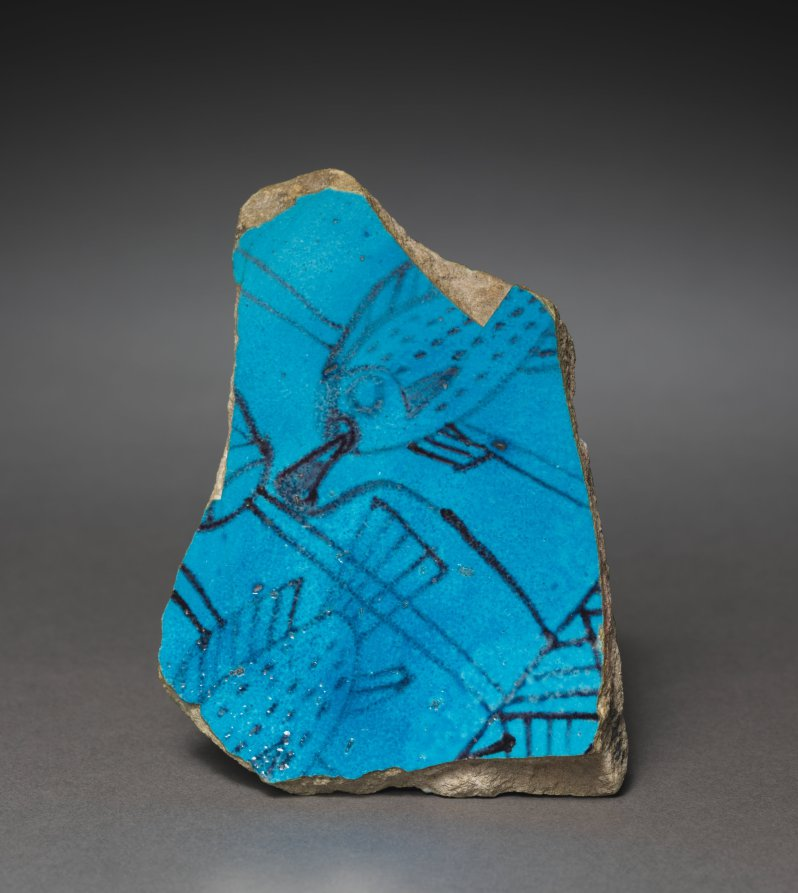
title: Marsh Bowl Fragment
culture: Egypt, New Kingdom (1540–1069 BCE), Dynasty 18, reign of Hatshepsut (c. 1479–1458 BCE) or reign of Tuthmosis III (1479–1425 BCE)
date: 1479–1429 BCE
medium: blue faience with purple decoration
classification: Vessels